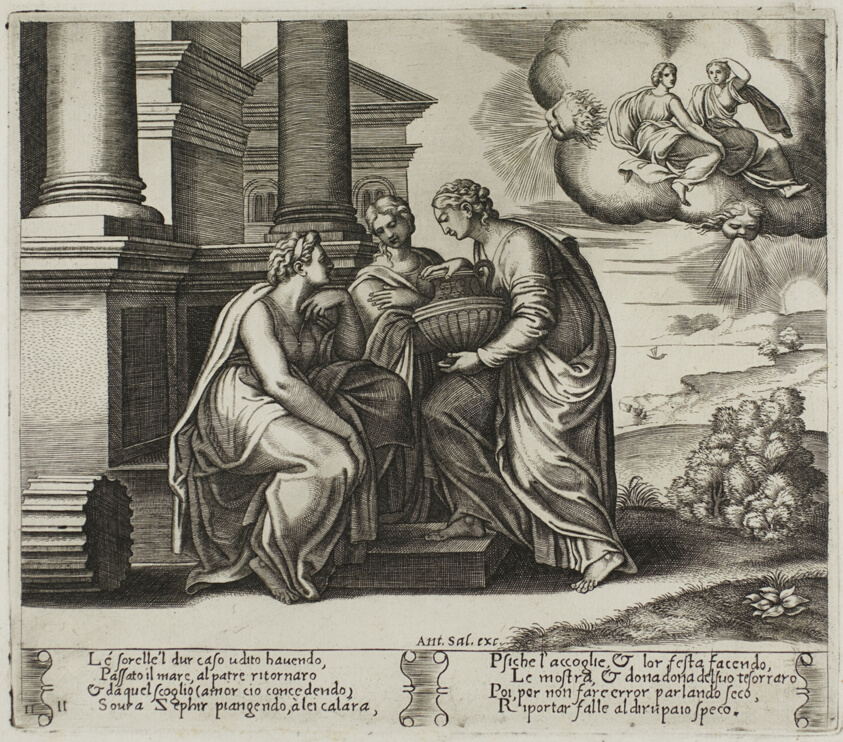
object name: Print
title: Psyche Gives Presents to Her Sisters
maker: Master of the Die (Italian, active c. 1530-1560); after Michiel Coxcie I (Flemish, 1499-1592); in turn, inspired by Raffaello Sanzio, called Raphael (Italian, 1483-1520)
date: 1530/40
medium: Engraving in warm brown ink on cream laid paper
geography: Italy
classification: engraving; print; prints and drawing